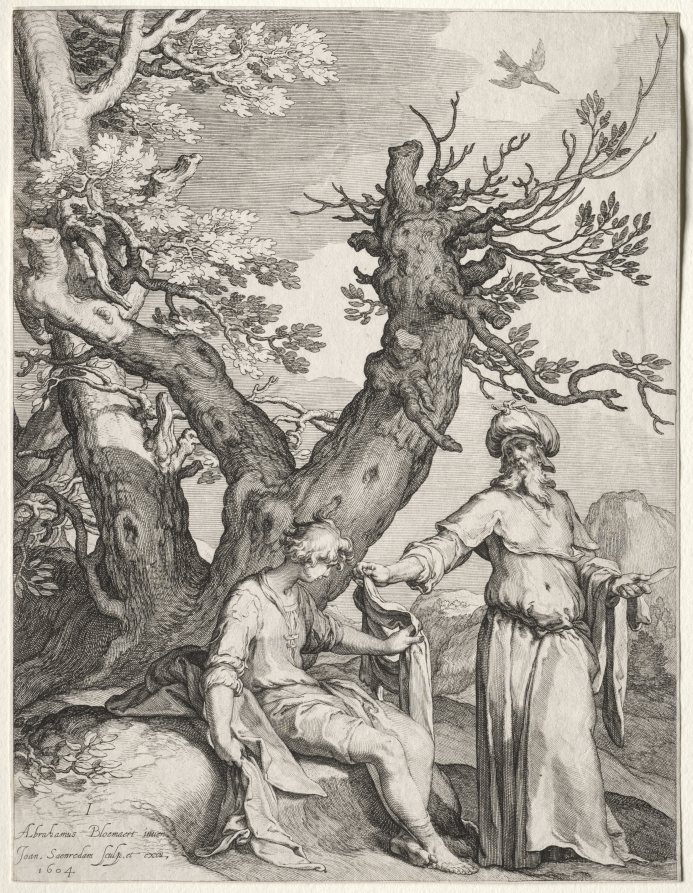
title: Ahijah and Jeroboam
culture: Netherlands, early 17th Century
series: Scenes of the Prophet Ahijah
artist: Jan Saenredam (Dutch, 1565–1607)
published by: Jan Saenredam (Dutch, 1565–1607)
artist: after Abraham Bloemaert (Dutch, 1566–1651)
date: 1604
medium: engraving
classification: Print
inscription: lower left, in plate: I / Abrahamus Bloemaert inven. / Joan. Saenredam scupl. et excu. / 1604 ; VERSO, lower left, in graphite: [a1?].a.4.P[c?]es 4... ; lower center, in graphite: $375-- ; lower right, in graphite: SET-BHH ; lower right, in graphite: B.20.23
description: These four prints were likely meant as two pairs of engravings depicting scenes of the lives of the prophets Ahijah and Elijah. Although Elijah was a common subject for artists, works featuring Ahijah were extremely rare. Other than their common source, the Book of Kings from the Bible, they have no thematic link. The action in this print shows the prophet Ahijah giving the young Jeroboam-a rebel leader set against the idol-worshipping King Solomon-ten portions of his own new mantle. This symbolic gesture predicts Jeroboam's rise to power as king of the ten tribes of Israel. Abraham Bloemaert (1566-1651) was the leading painter in Utrecht, where he enjoyed a long and prolific career. Coming to maturity at the height of Mannerism, his influential designs were widely disseminated through prints and drawings. Although he worked closely with printmakers like Jan Saenredam and Jacob Matham, he did not make prints himself, with the possible exception of one etching.